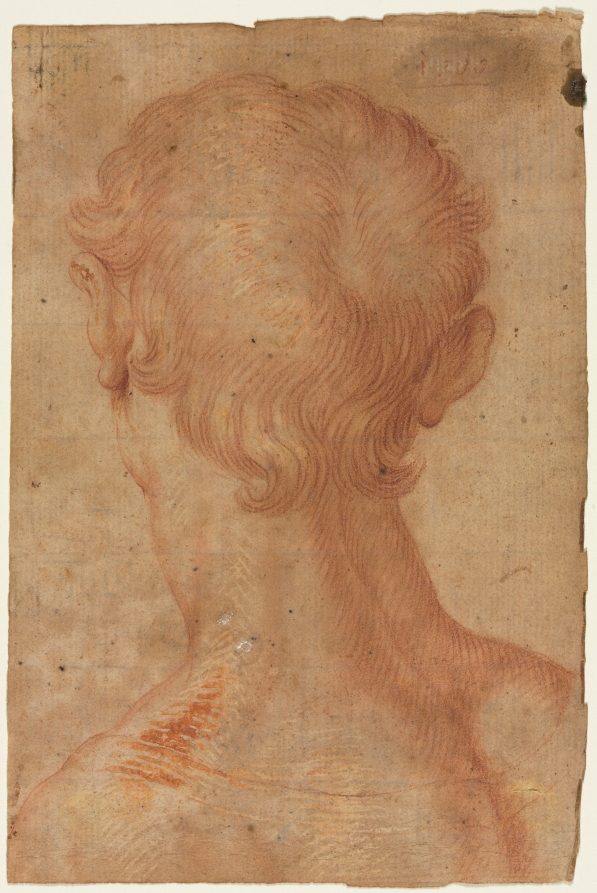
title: Man's Head from the Back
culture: Italy, 16th century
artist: copy after Agnolo Bronzino (Italian, 1503–1572)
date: 16th century?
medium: red chalk with red and white gouache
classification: Drawing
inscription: upper right, in red chalk: i[?][oo?] [underlined] ; VERSO, upper left, in red pencil: A 83 ; upper right, in red pencil: 10- ; lower center, in graphite: 83 [circled]